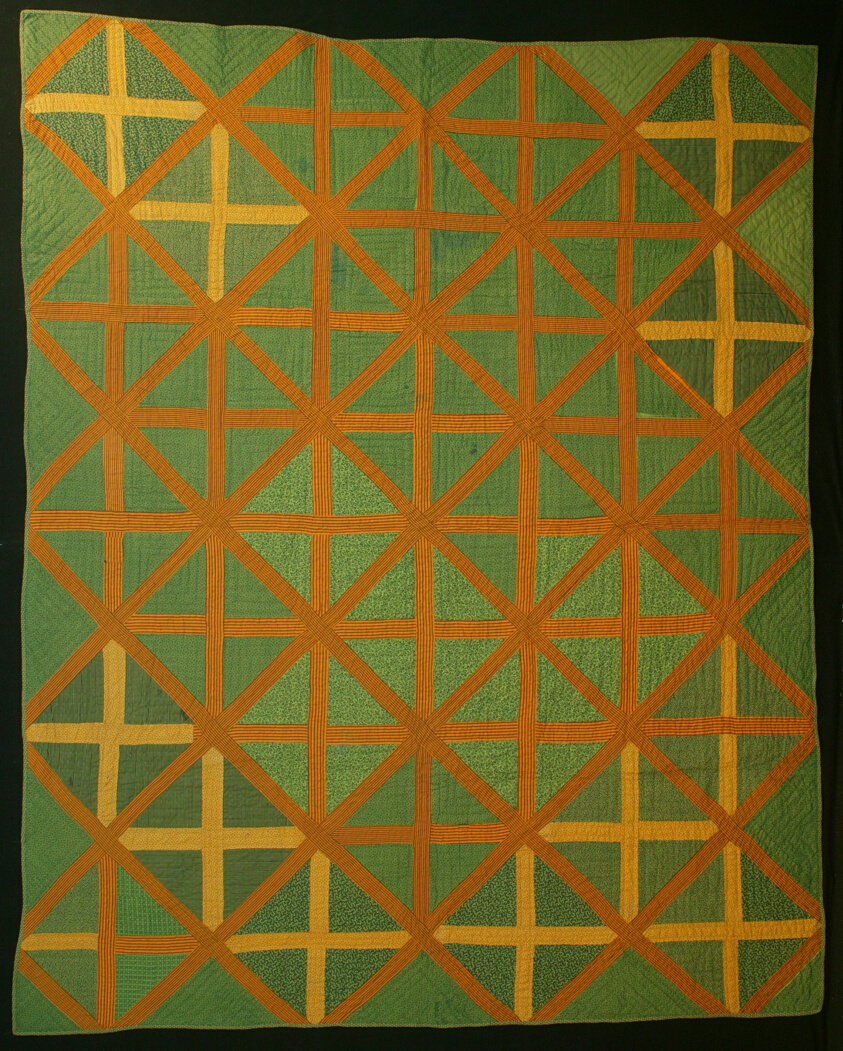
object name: Textile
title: Bedcover ("Crossroads" Quilt)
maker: United States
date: 19th century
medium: Cotton, various plain weaves; printed; pieced; quilted; backed with cotton, plain weave; pieced; edged with cotton, plain weave; printed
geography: United States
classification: needlework - quilt; textile